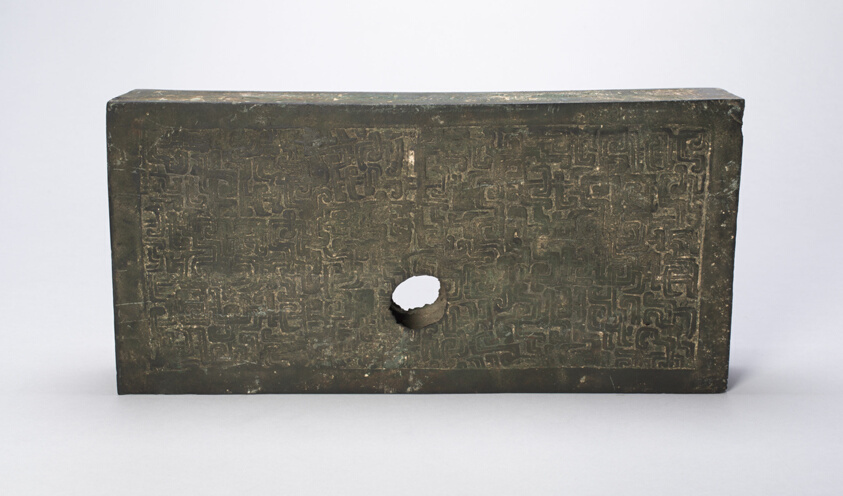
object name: Architectural fragment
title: Architectural Fitting (Gong)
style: Chinese (culture or style)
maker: China, Qishan county, Shaanxi province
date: Eastern Zhou dynasty, Spring and Autumn period (770–481 B.C.), 7th century B.C.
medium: Bronze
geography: China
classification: architectural fragment